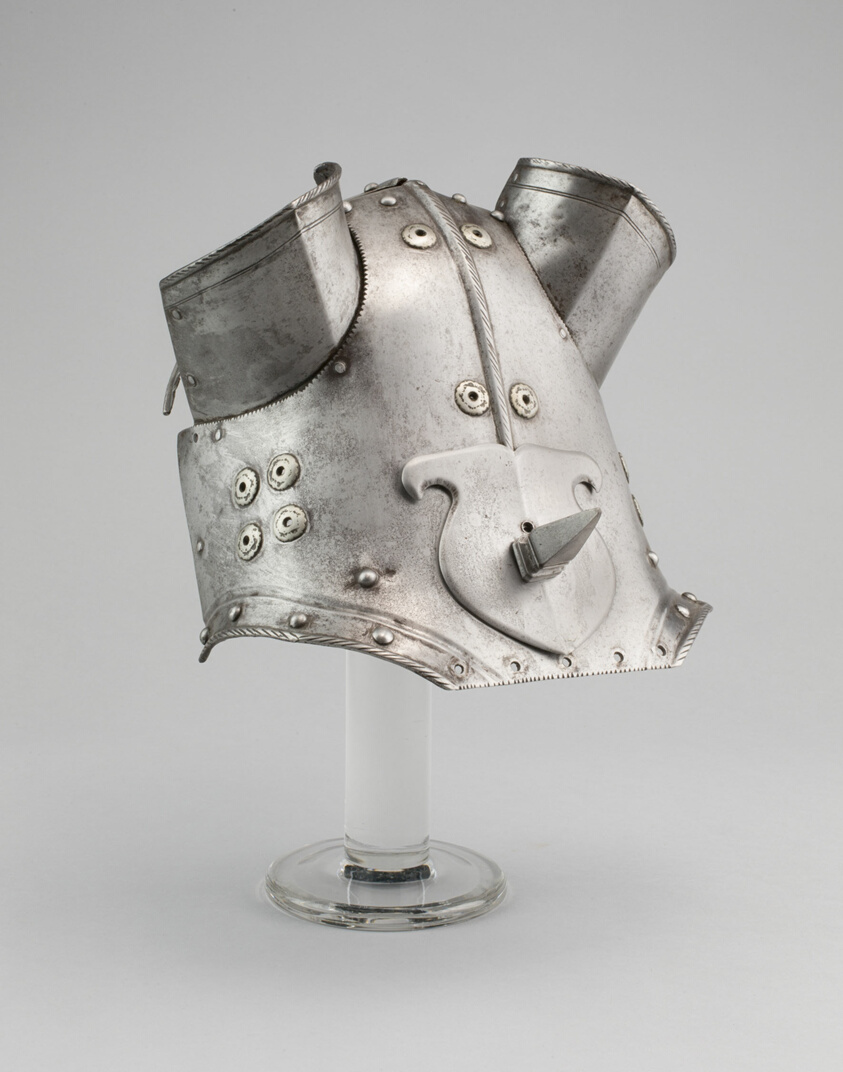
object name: Armor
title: Demi Shaffron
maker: German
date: 1570/80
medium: Steel, pewter, and leather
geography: Germany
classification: horse equipment; armor; arms and armor